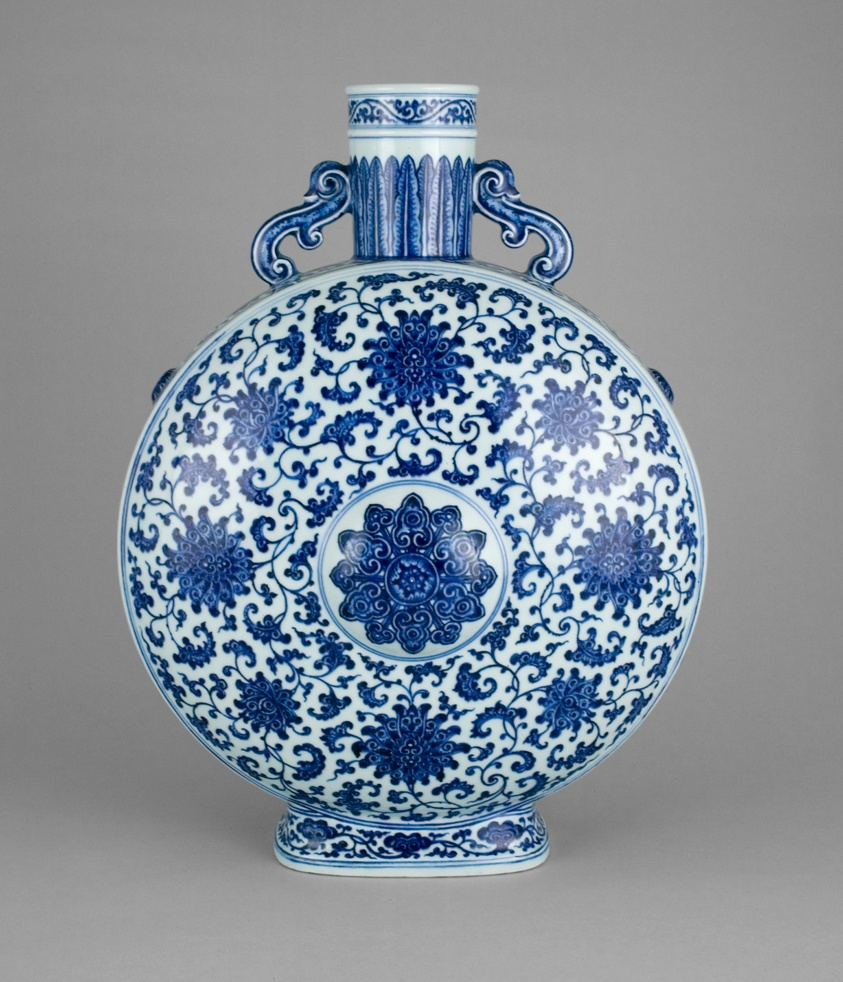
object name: Vessel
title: Moon Flask (Bianhu) with Lotus Scroll and Central Floret,Ruyi Mushrooms (base) and Plantain Leaves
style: Chinese (culture or style)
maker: China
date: Qing dynasty (1644–1911), Qianlong reign mark and period (1736–1795)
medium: Porcelain painted in underglaze blue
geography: China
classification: vase; porcelain; vessel; asian art; ceramics